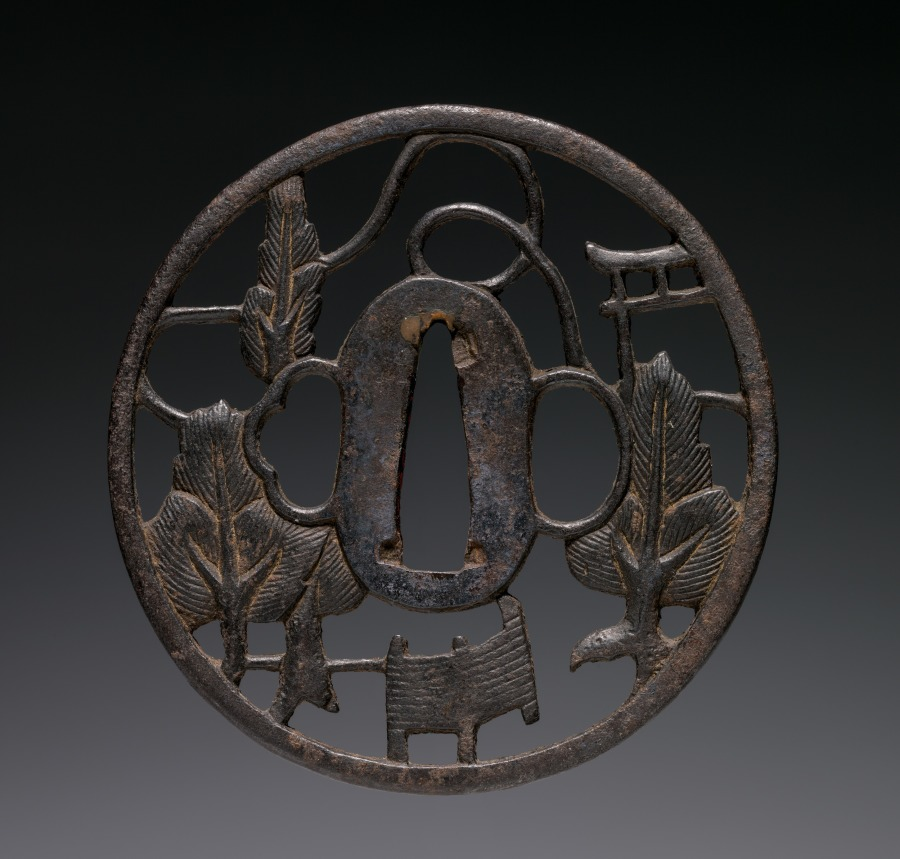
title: Sword Guard (Tsuba)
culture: Japan, possibly Edo period (1615-1868)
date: c. 1615–1868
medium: iron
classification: Arms and Armor